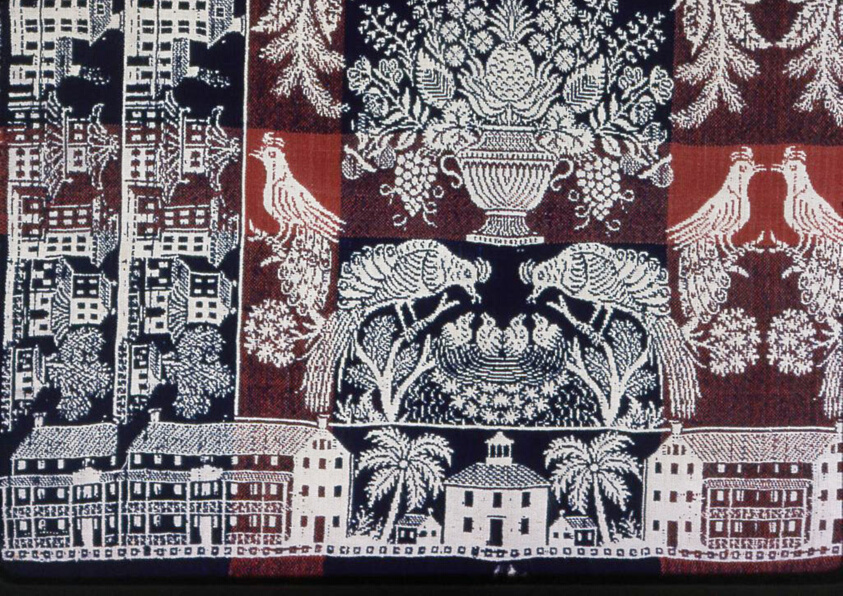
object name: Textile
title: Coverlet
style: 19th century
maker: United States, Ohio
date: 1840/45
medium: Cotton and wool, plain weave double cloth; warp and weft fringe; woven on loom with Jacquard attachment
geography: United States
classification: weaving - coverlet; coverlet; textile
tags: birds, foliage, flowers, trees, buildings, babies, bird, boston, houses, nest, urns, vase, coverlet